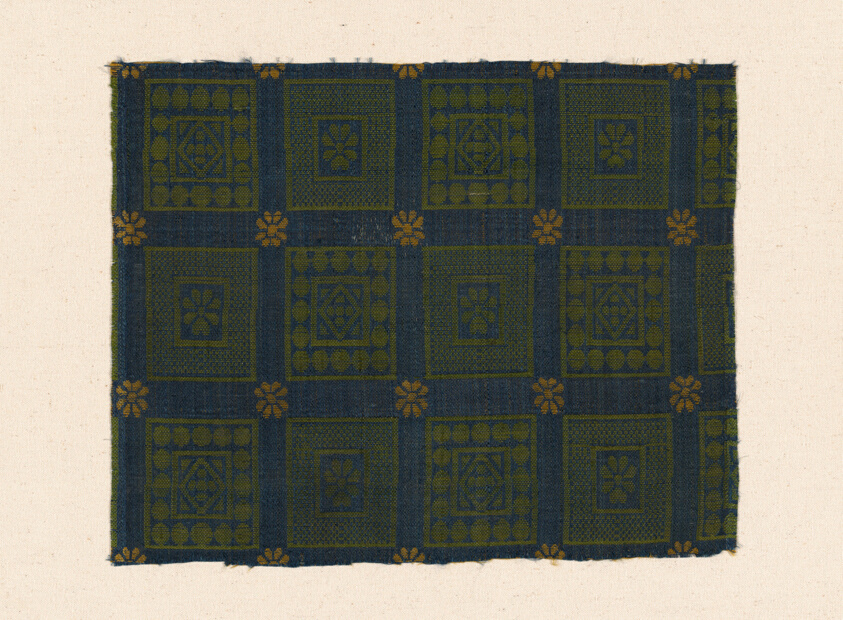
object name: Textile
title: Fragment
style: mamluk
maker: Egypt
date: Mamluk period (1250–1517), 14th/15th century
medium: Silk, warp-float faced 2:1 twill weave with supplementary patterning wefts bound by secondary binding warps in plain interlacings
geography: Egypt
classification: textile; weaving